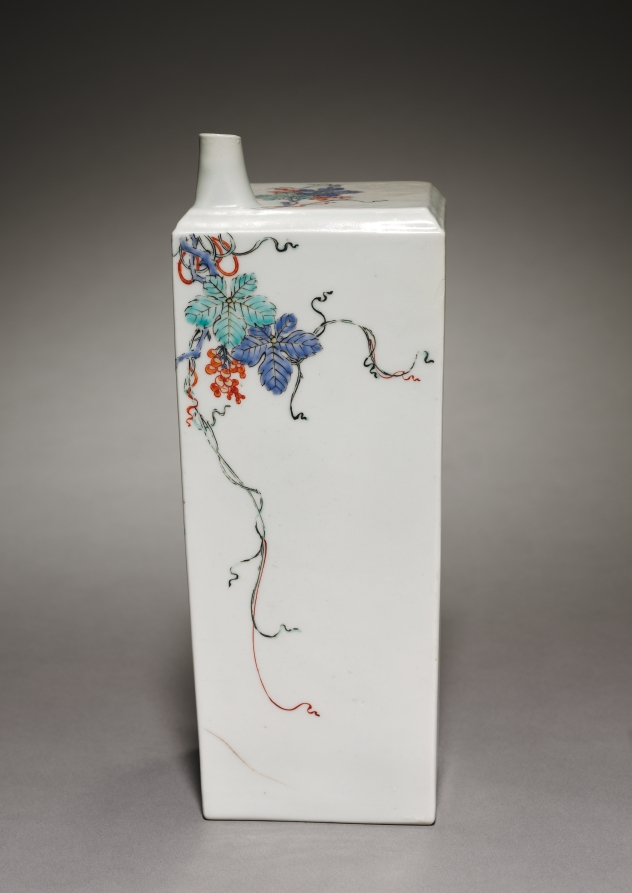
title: Square Bottle with Squirrel and Grapes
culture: Japan, Edo period (1615–1868)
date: late 1600s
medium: porcelain with overglaze color enamel (possibly Hizen ware, Kakiemon type)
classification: Ceramic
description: In the 1600s, Korean and Japanese elites could enjoy wine from Europe. In his 1636 travel diary called Haecharok, Kim Seryeom, a vice director of Korean envoys to Japan, recorded that the head of Japan’s Tsusima Island treated him to Western red wine. Therefore, export porcelain ware like Square Bottle with Squirrel and Grapes could have been made as a wine bottle.